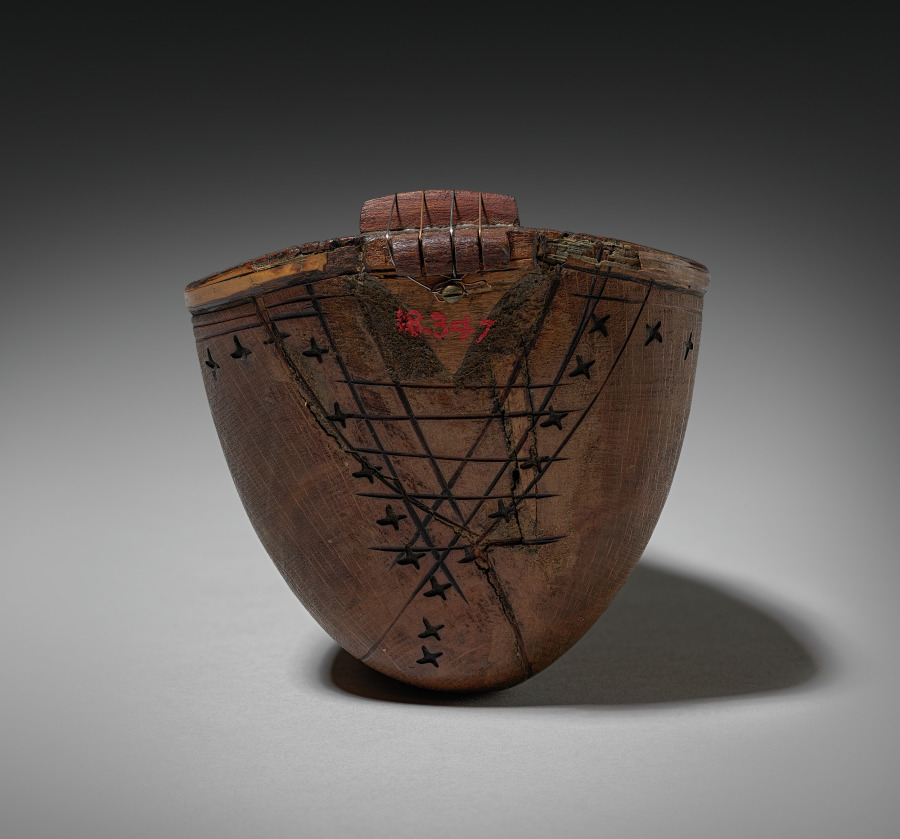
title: Tanbūr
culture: Syria or Turkey, Ottoman period (1299–1922)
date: late 1800s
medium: Wood, bone, mother-of-pearl, and wire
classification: Musical Instrument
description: This long-necked lute collected in Ottoman Syria possesses traits that are Syrian, Turkish, and Iranian and provides an example of the musical interaction between cultures. It is an ancient instrument and resembles lutes used in Pharaonic Egypt and Mesopotamia. In its many forms, the tanbūr was a common instrument throughout the Islamic world. It is often used as a solo instrument in both sacred and secular contexts. Burn marks decorate the pear-shaped body along with inlaid dots of mother-of-pearl, which may also have helped with navigation of the fret board by the player.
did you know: The two pairs of wire strings would be played with a quill plectrum.